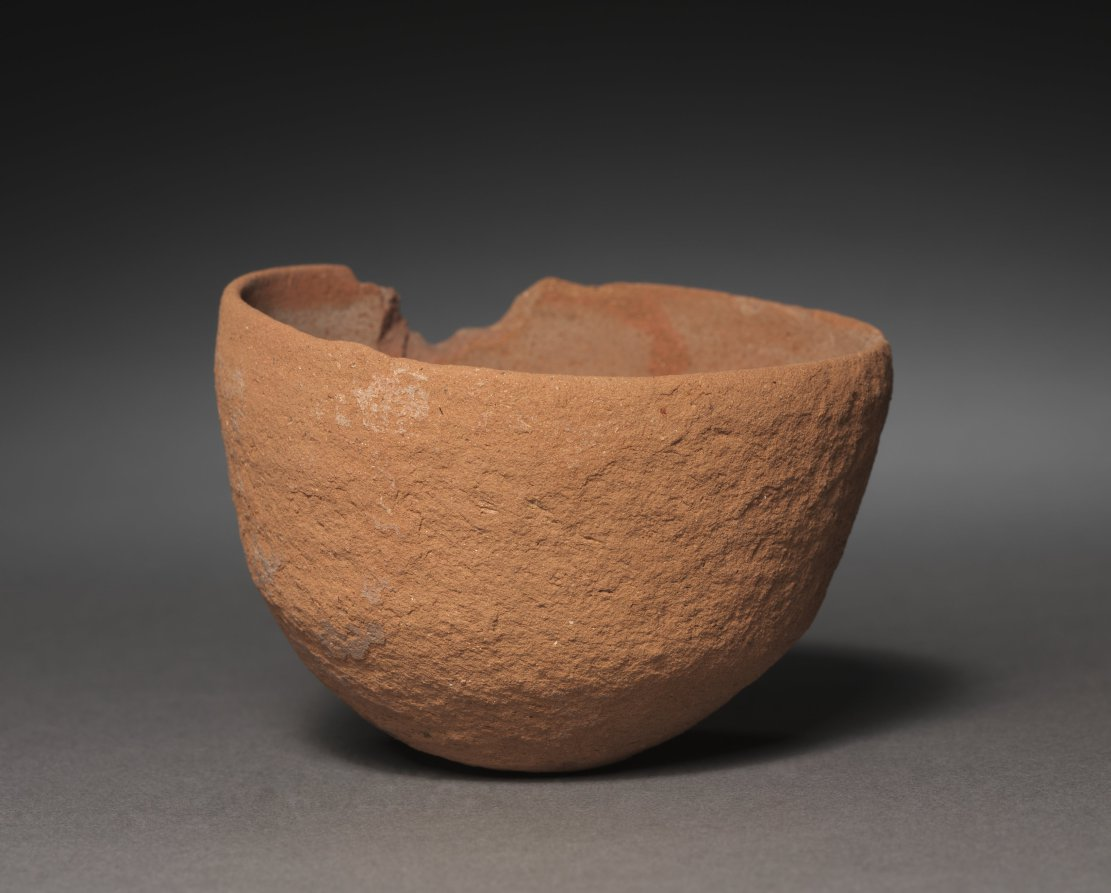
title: Drinking Cup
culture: Egypt, Middle Kingdom (2040–1648 BCE), Dynasty 12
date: 1980–1801 BCE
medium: Nile silt ware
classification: Vessels